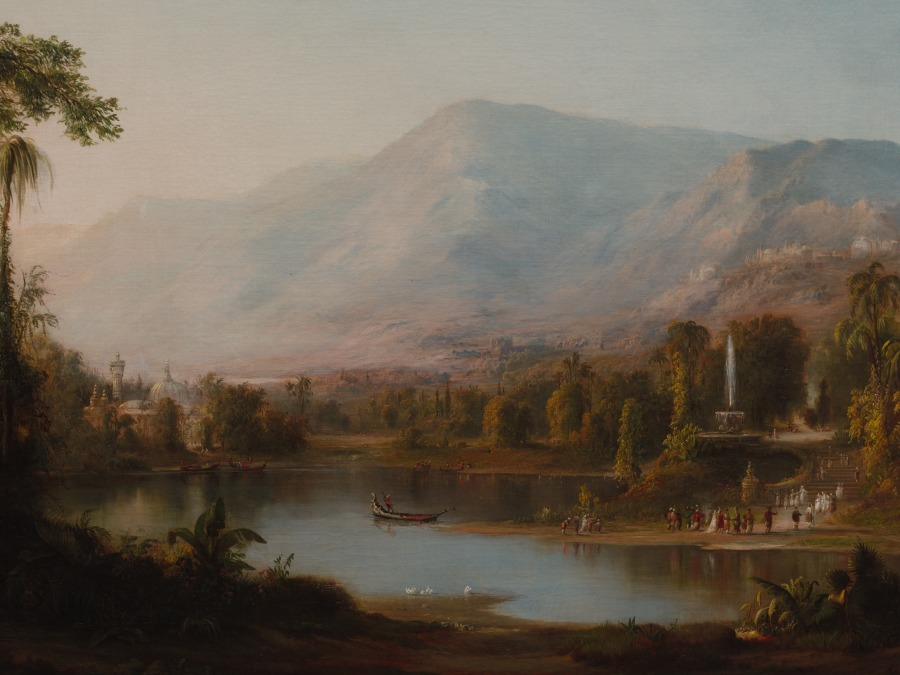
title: Vale of Kashmir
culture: America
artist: Robert S. Duncanson (American, 1821–1872)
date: 1867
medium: oil on canvas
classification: Painting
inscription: Inscribed at lower right: Duncanson. / 1867. / Cinti O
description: Cincinnati-based Duncanson was the first African American artist to achieve recognition both nationally and abroad. This panoramic painting, one of his grandest, was inspired by an episode in Thomas Moore’s then-popular epic poem, Lalla-Rookh (1817), which describes a Persian princess’s journey to the Indian subcontinent to be married. In Duncanson’s conception, members of a courtly entourage depart a quasi-Islamic palace, arriving by boat onto a scrim of land where they ascend a monumental staircase to a plaza with a fountain spraying an impressive plume of water. Despite these substantial storytelling details, the human elements remain subordinate to the overwhelming splendor of the natural landscape in and of itself.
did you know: During the Civil War, Duncanson relocated to Montreal, where he inspired several Canadian landscape painters.